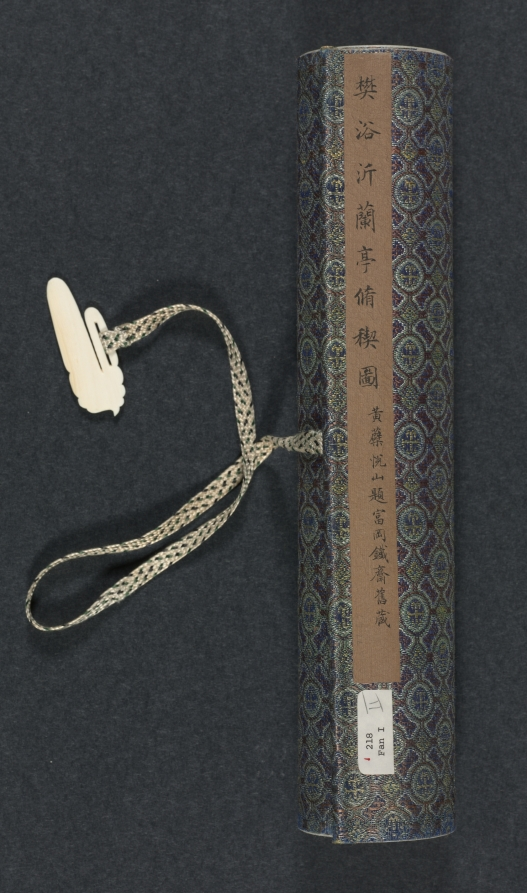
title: Purification at the Orchid Pavilion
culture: China, Qing dynasty (1644-1911)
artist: Fan Yi (Chinese, c. 1615–before 1688)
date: 1671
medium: Handscroll; ink and color on silk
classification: Painting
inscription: Artist's inscription, signature, and 2 seals: Painted by Fan Yi of Zhongfu during the second month of winter of the xinhai year [1671]. [2 seals] Fan Yi zhi yin, Zi yu yi.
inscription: Title on the frontispiece by Monk Yueshan (1629-1709).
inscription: 3 colophons and 13 additional seals: 1 colophon, dated 1707, and 6 seals of Yueshan; 2 colophons and 3 seals of Wong Kwan-Shut (Huang Junshi) 黃君實 (b. 1934); 2 seals of Fu Shen 傅 申 (b. 1937); 2 seals of Tessai Tomioka 富岡鐵齋 (1836-1924).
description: By the 1600s, the historic gathering at Lanting, Zhejiang province, in 353 CE was a common theme in Chinese painting. Originally based on a composition attributed to Li Gonglin (1049– 1106), now lost, Wu school artists revived the theme. Fan Yi, the brother of the artist Fan Qi from Nanjing, used delicate brushwork and luminous colors to depict the spring gathering.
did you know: The gathering’s host is in the Orchid Pavilion at the end of the scroll, representing an episode known as “Wang Xizhi Watching the Geese 王羲之觀鵝圖.”